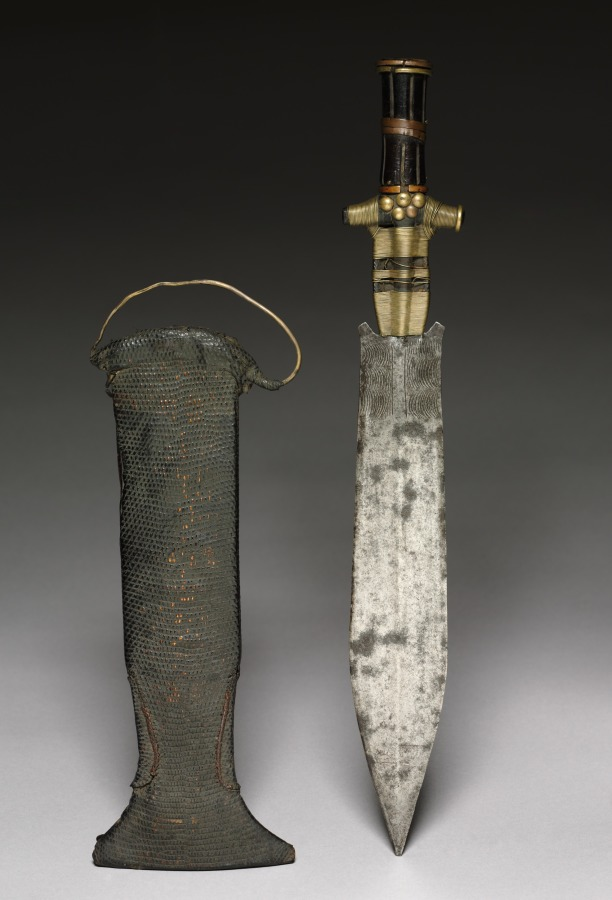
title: Knife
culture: Africa, Central Africa, Democratic Republic of Congo, unknown maker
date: 1800s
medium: Iron, wood, copper alloy, reptile skin, leather or rawhide, and upholstery studs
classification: Arms and Armor